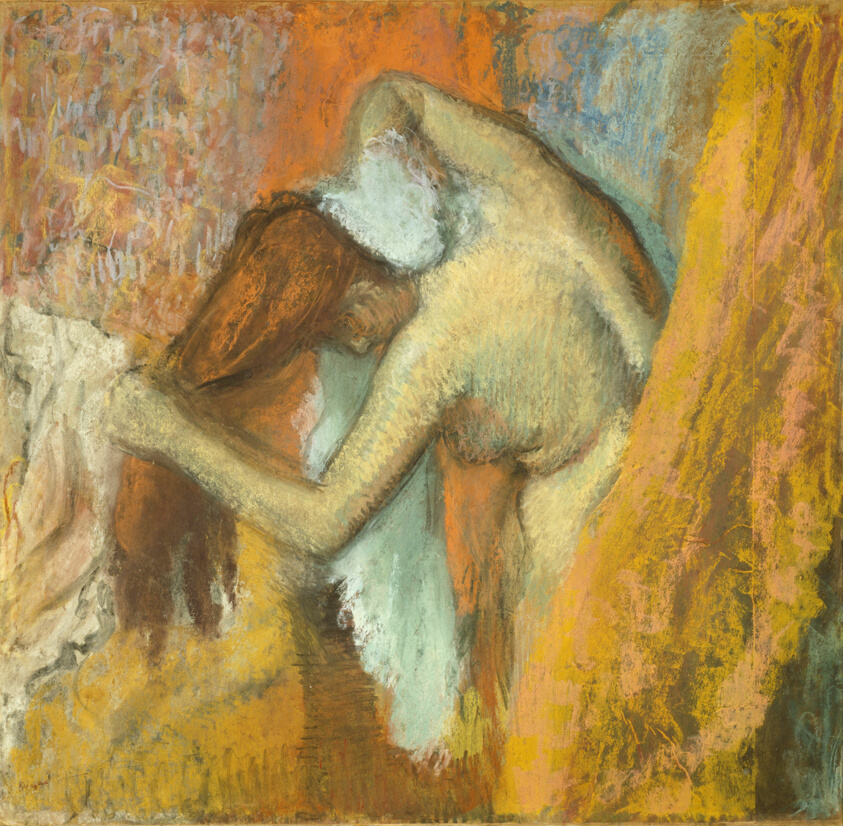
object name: Drawing and Watercolor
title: Woman at Her Toilette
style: Impressionism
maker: Edgar Degas; French, 1834-1917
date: 1900/05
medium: Pastel on tracing paper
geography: France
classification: pastel; drawings (visual works); prints and drawing; paper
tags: women, interior, domestic scenes, everyday life (genre), water